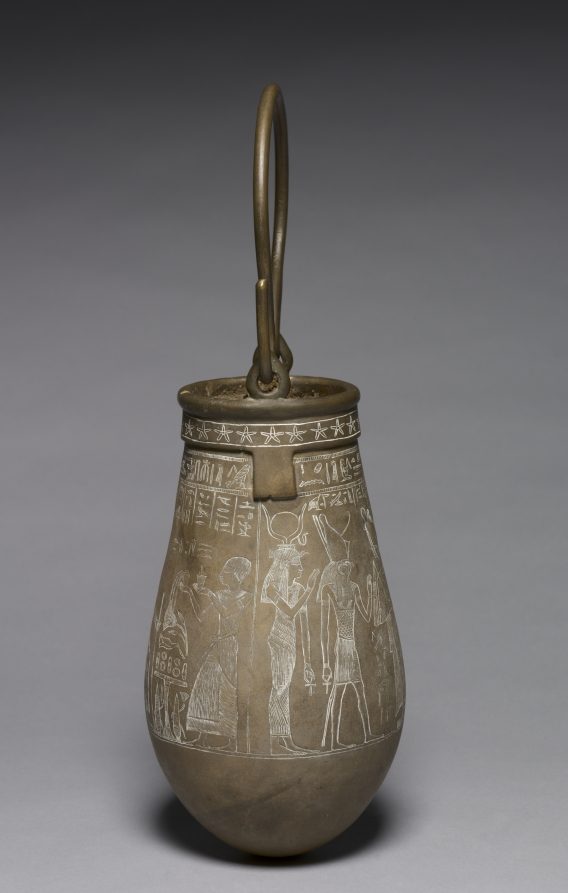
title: Decorated Situla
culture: Egypt, Greco-Roman period (332 BCE–395 CE), Ptolemaic dynasty (305–30 BCE)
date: 305–30 BCE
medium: bronze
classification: Vessels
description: The situla was a deluxe ritual vessel that played an important role in Egyptian religious ceremonies. The two scenes on this situla exemplify the dual roles of a pious Egyptian in the afterlife: receiving offerings from his family on the one hand and making offerings to the gods on the other. On one side of the vessel the deceased, Padiamennebnesuttawy ("He who Amen, lord of Karnak, gives"), sits in a low chair accompanied by his pet dog. The vertical, cross-shaped sign preceding the animal is his name, Nefer, meaning "good one" or "beautiful one." On the right, the deceased's eldest son, Amenhotep, makes offerings of incense and water to his father. On the other side the deceased demonstrates his piety by making an offering of round loaves of bread, vegetables, and meat to the gods. Opposite him are the gods who are the recipients of his offerings—Osiris, god of the dead; Horus, son of Isis; and Isis herself—each of whom wears elaborate beaded and feathered garments.